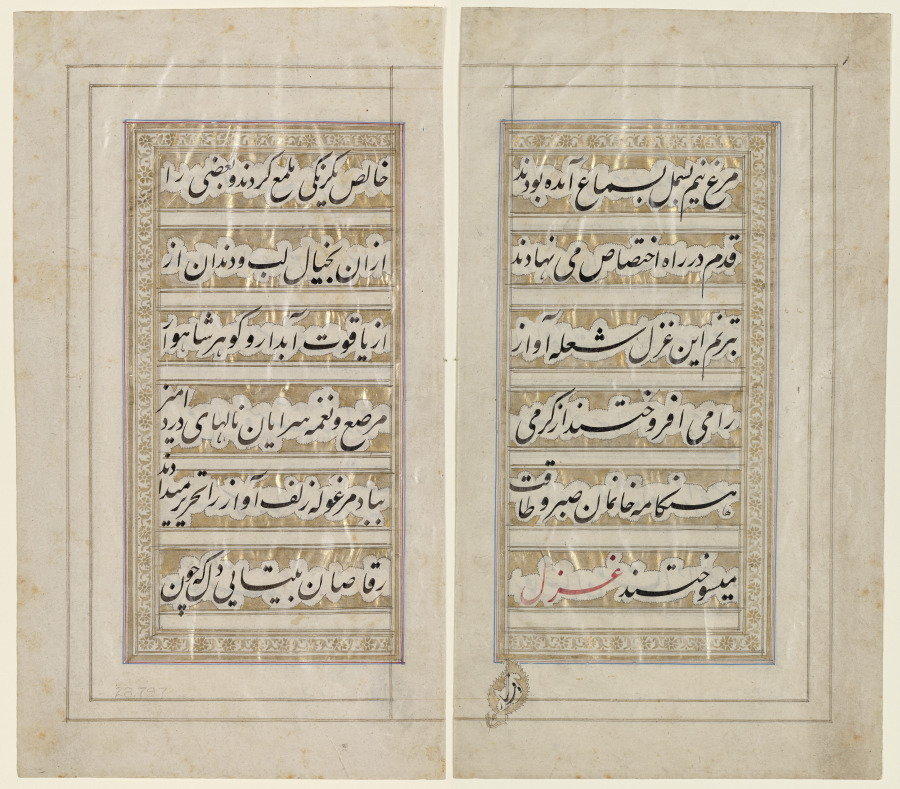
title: Page from the Poem of Beauty and Love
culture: India, Kashmir, Mughal, 19th century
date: 1848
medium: painting on paper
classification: Painting